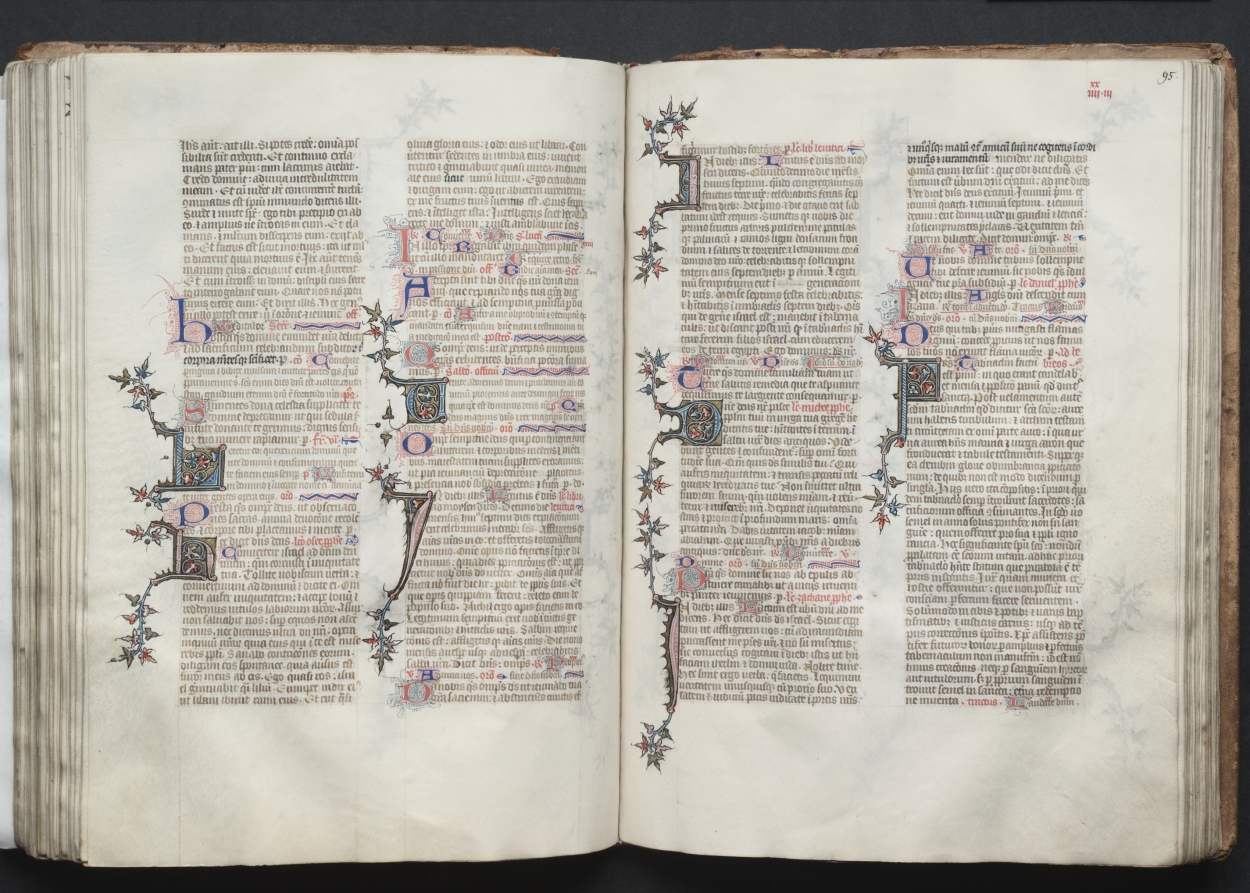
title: The Gotha Missal: Fol. 95r, Text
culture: France, Paris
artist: Master of the Boqueteaux (French)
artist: and Workshop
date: c. 1375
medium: ink, tempera, and gold on vellum; blind-tooled leather binding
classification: Bound Volume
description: The style and quality of this manuscript's decoration is typical of deluxe Parisian books made for aristocratic or royal patrons. Most of the book's decoration appears to be the work of the Master of the Boqueteaux, an artist active at the court of King Charles V (died 1380). His style was apparently shared by a number of book illuminators working in and around Paris. It is very possible that the Gotha Missal belonged to Charles V, but is not provable because the manuscript has no royal portraits and lacks a colophon. Given the book's magnificent decoration, however, it would seem that it was produced for a Valois prince, if not for the king himself. The manuscript receives its name from the German dukes of Gotha, its later owners.